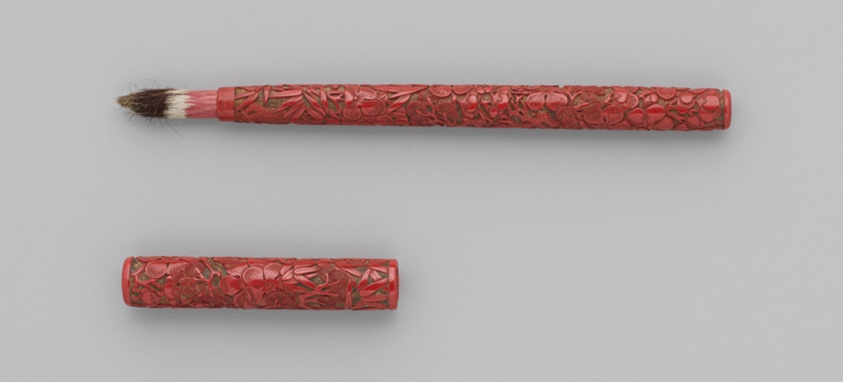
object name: Decorative Arts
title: Writing Brush and Cover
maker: China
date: Late Ming（1368-1644）or early Qing（1644-1912）dynasty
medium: Cinnabar Lacquer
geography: China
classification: lacquer